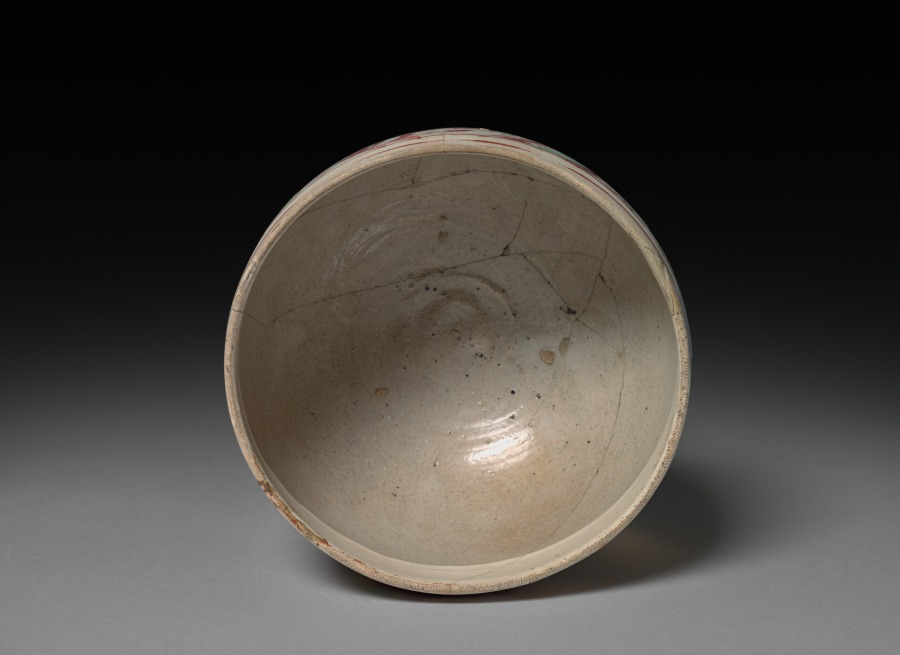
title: Bowl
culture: China, Jin dynasty (1115-1234) - Yuan dynasty (1271-1368)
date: 1200s–1300s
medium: buff stoneware with underglaze slip application and overglaze enamel decoration; Cizhou ware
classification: Ceramic